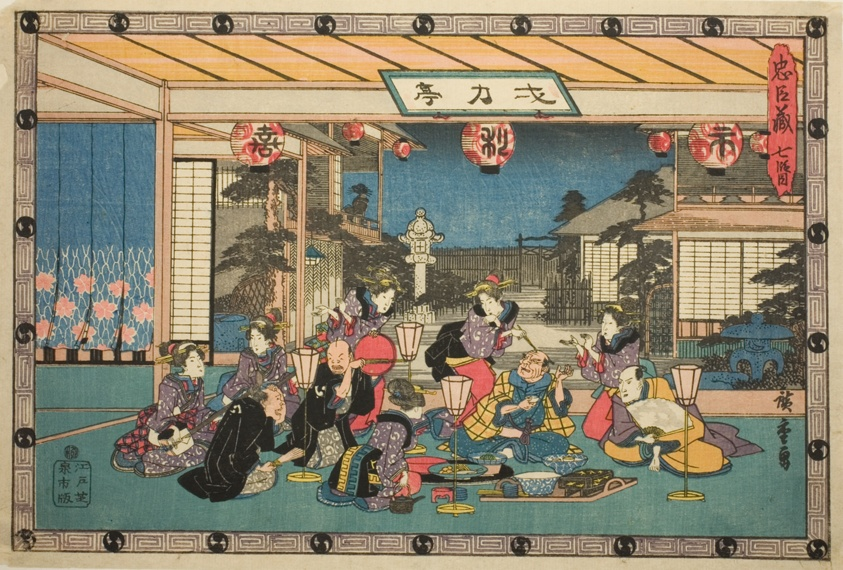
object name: Print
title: Act 7 (Shichidanme), from the series "The Revenge of the Loyal Retainers (Chushingura)"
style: Japanese (culture or style)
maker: Utagawa Hiroshige 歌川 広重; Japanese, 1797-1858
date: c. 1834/39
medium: Color woodblock print; oban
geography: Japan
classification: woodblock print; print; asian art